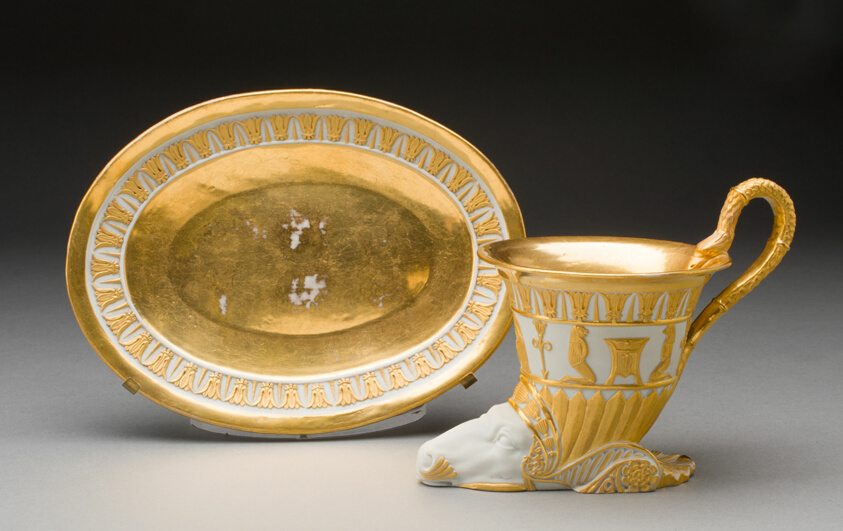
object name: Ceramics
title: Cup and Saucer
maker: Meissen Porcelain Manufactory (German, founded 1710)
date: c. 1805/10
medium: Hard-paste porcelain with gilt decoration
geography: Germany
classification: drinking vessel; porcelain; european decorative arts; ceramics